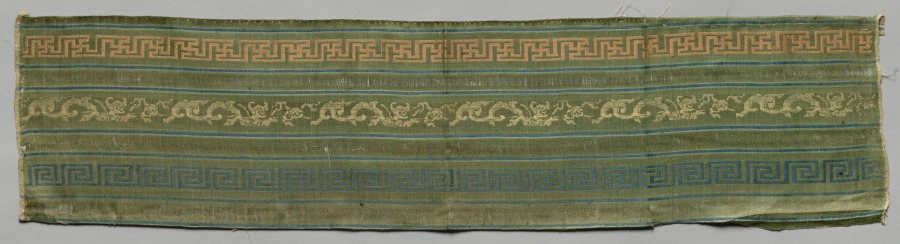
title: Border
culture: China, 19th century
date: 1800s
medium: silk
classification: Textile